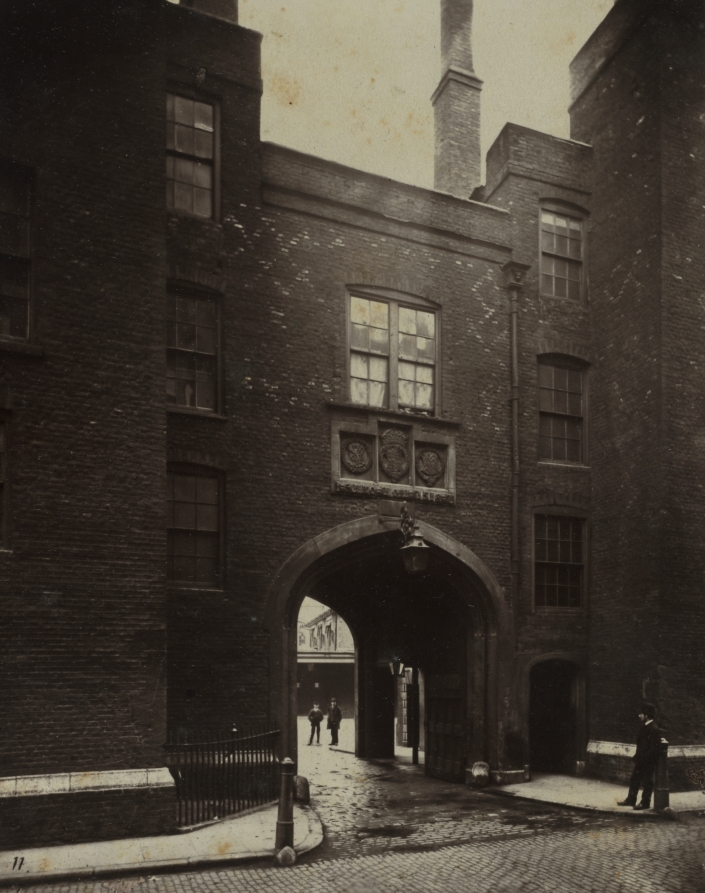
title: Lincoln's Inn, Gate House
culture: England, 19th century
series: Old London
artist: Alfred H. Bool (British)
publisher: The Society for Photographing the Relics of Old London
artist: and John Bool (British)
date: 1876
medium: carbon print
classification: Photograph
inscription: Written in ink on recto: "99"; "11"